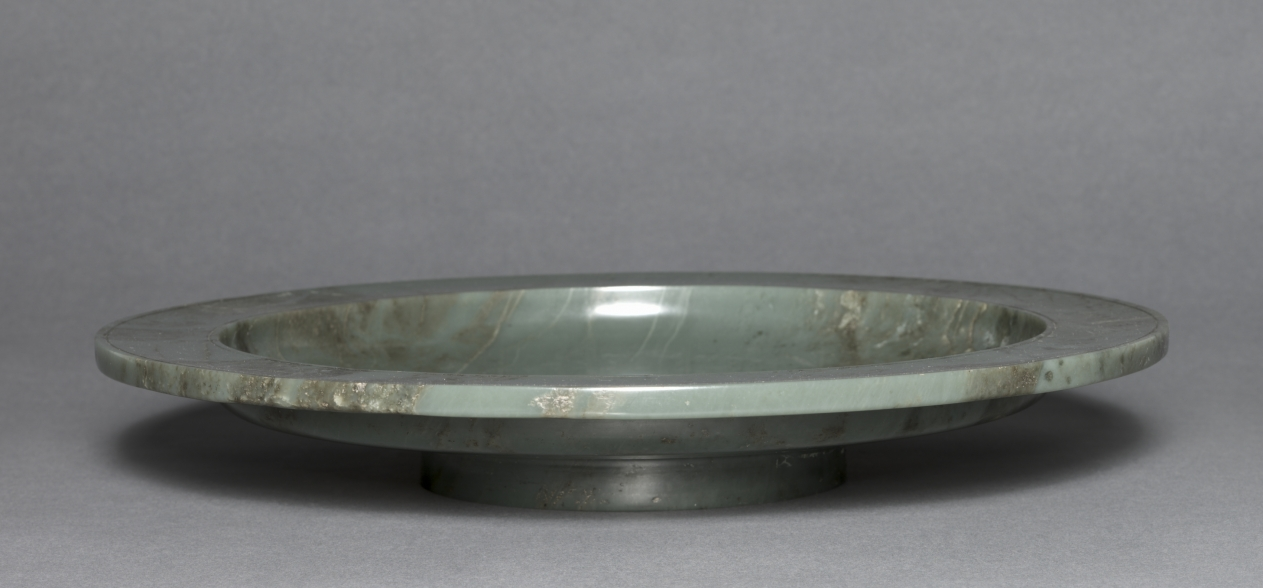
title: Footed Platter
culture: India, Mughal Dynasty (1526-1756)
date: 1600s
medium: nephrite (jade)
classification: Jade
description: Emperors Jahangir and Shah Jahan both admired jade. The material linked them to their ancestor Timur, whose tombstone in Samarkand was carved from a large piece of jade. This platter probably would have been used for serving fruit at courtly gatherings.